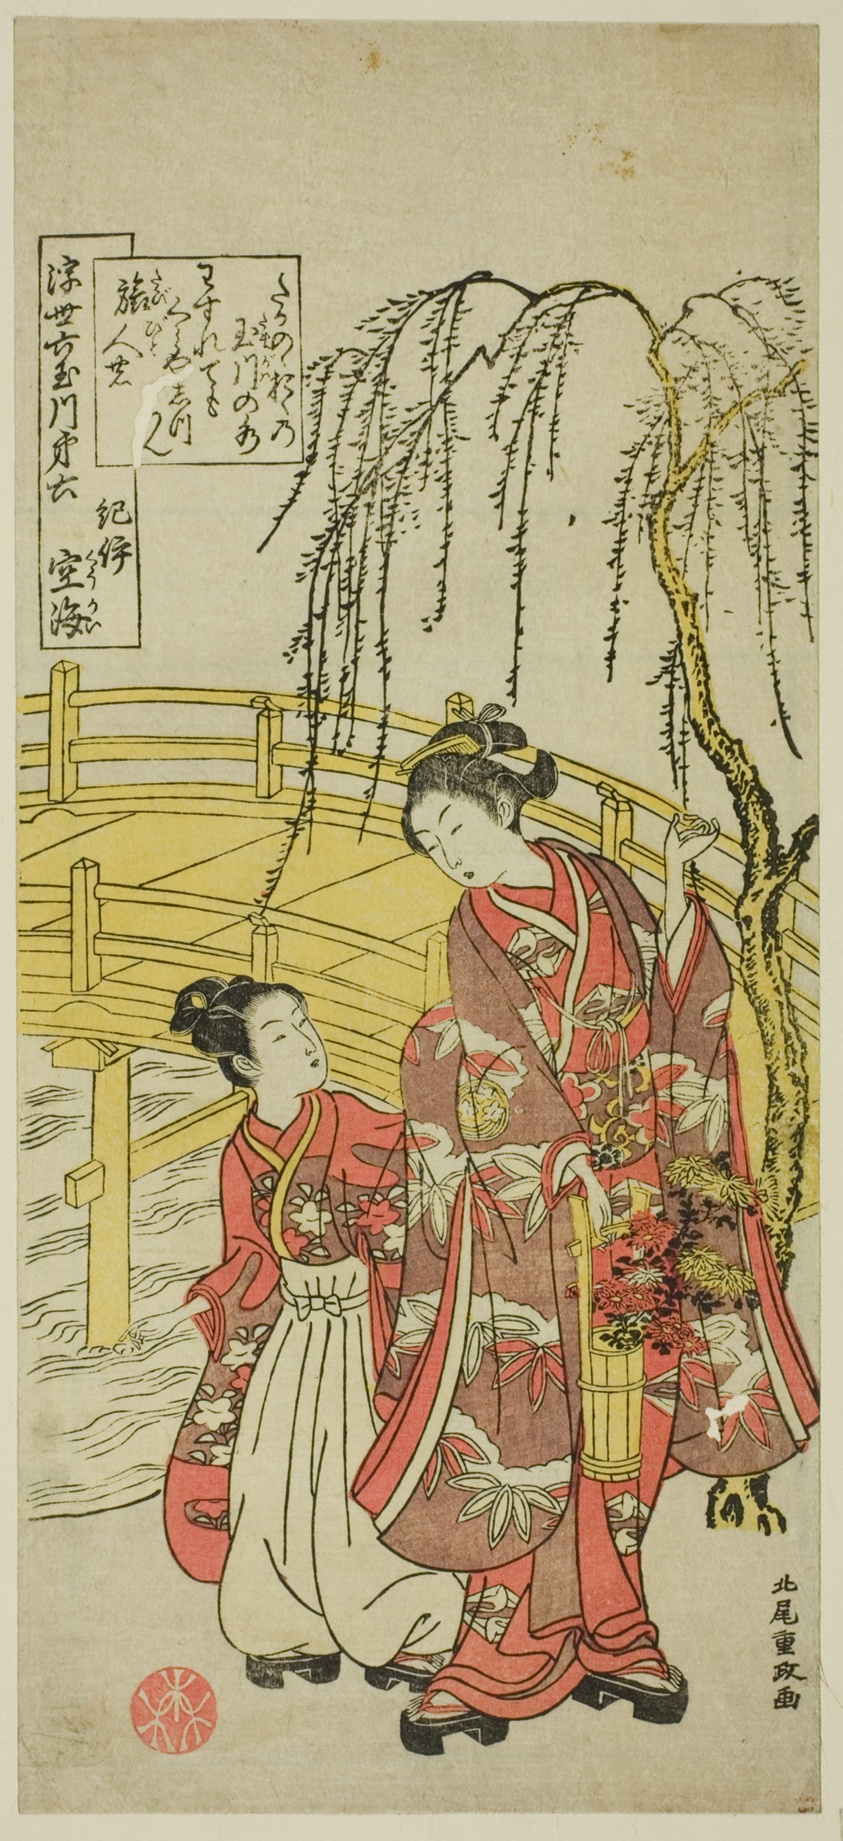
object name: Print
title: No. 6: Tama River of Koyasan in Kii Province, from the series "Six Jewel Rivers of the Floating World (Ukiyo Mu Tamagawa)"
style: Japanese (culture or style)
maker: Kitao Shigemasa (Japanese, 1739-1820)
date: c. 1769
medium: Color woodblock print; hosoban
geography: Japan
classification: woodblock print; print; asian art